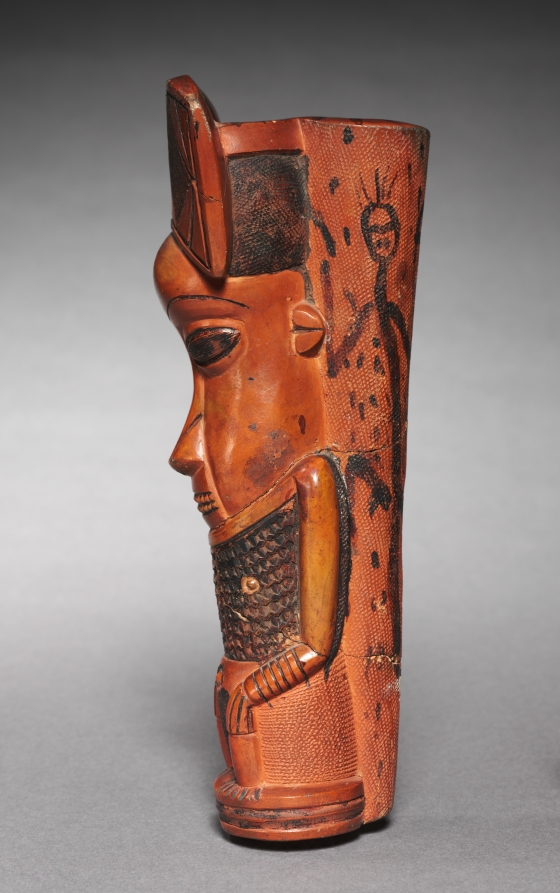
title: Pipe Bowl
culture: Equatorial Africa, Cameroon, Bali, 20th century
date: before 1935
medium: Ceramic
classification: Implements